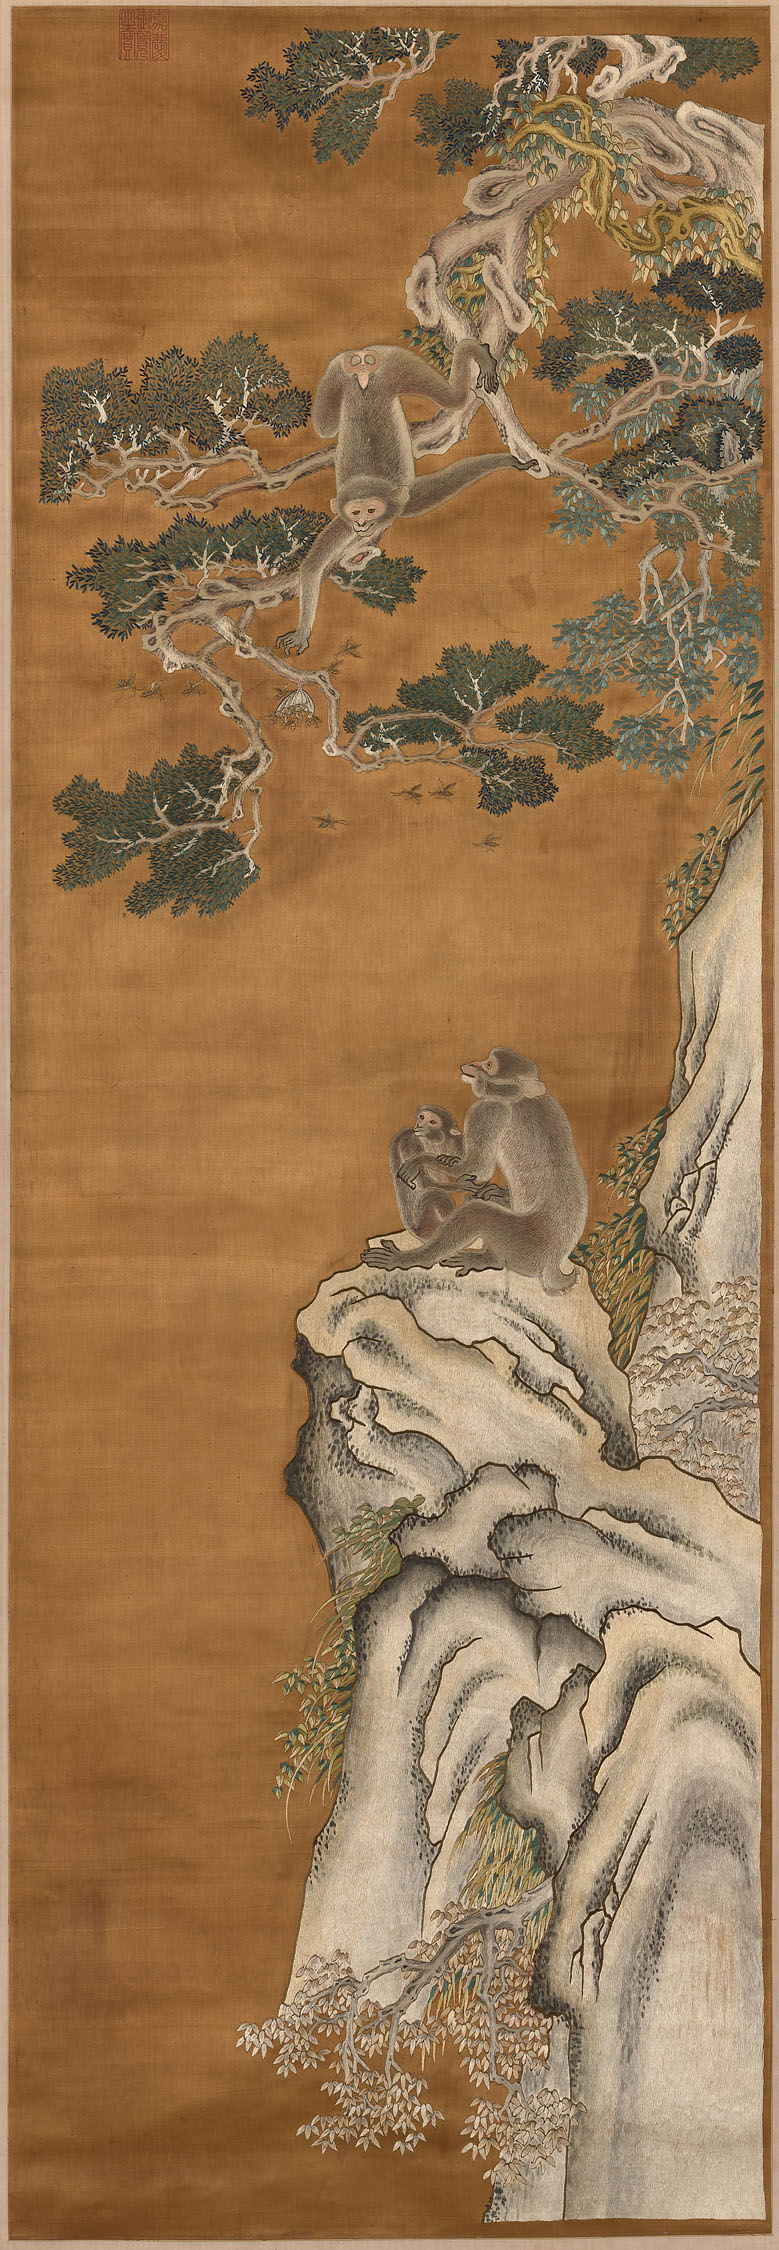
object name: Textile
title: Scroll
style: qing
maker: China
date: Qing dynasty (1644–1911), c. 1860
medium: Silk, satin weave; embroidered with silk and gilt-paper-strip-wrapped silk in satin stitches; couching; painted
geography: China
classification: textile; needlework (visual works); weaving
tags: monkeys, animals